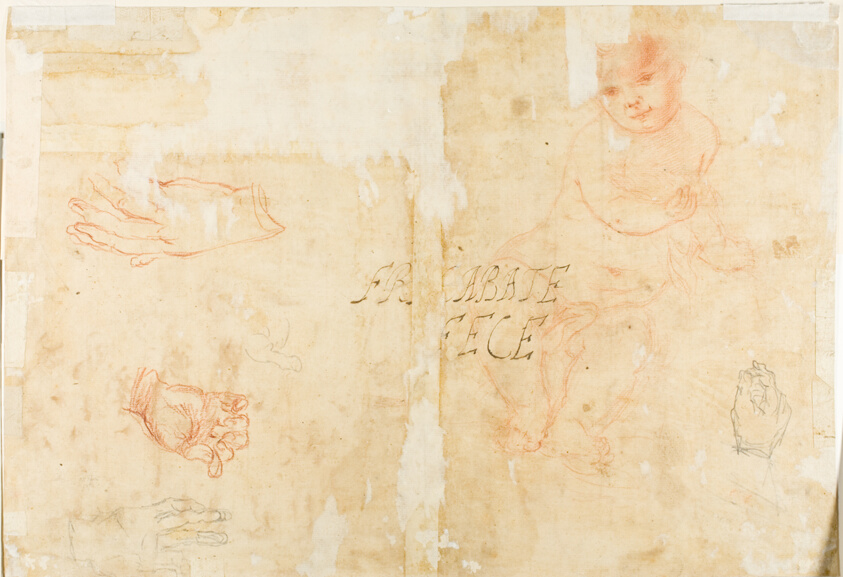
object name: Drawing and Watercolor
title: Saint Paul Baptizing Dionysus the Areopagite (recto); Sketches of Baby, Hands (verso)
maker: After Antonio Carracci; Italian, 1583-1618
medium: Pen and black and brown ink, with brush and brown wash, over graphite (recto), and pencil and red chalk (verso), on tan laid paper (pieced)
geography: Italy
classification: drawings (visual works); prints and drawing